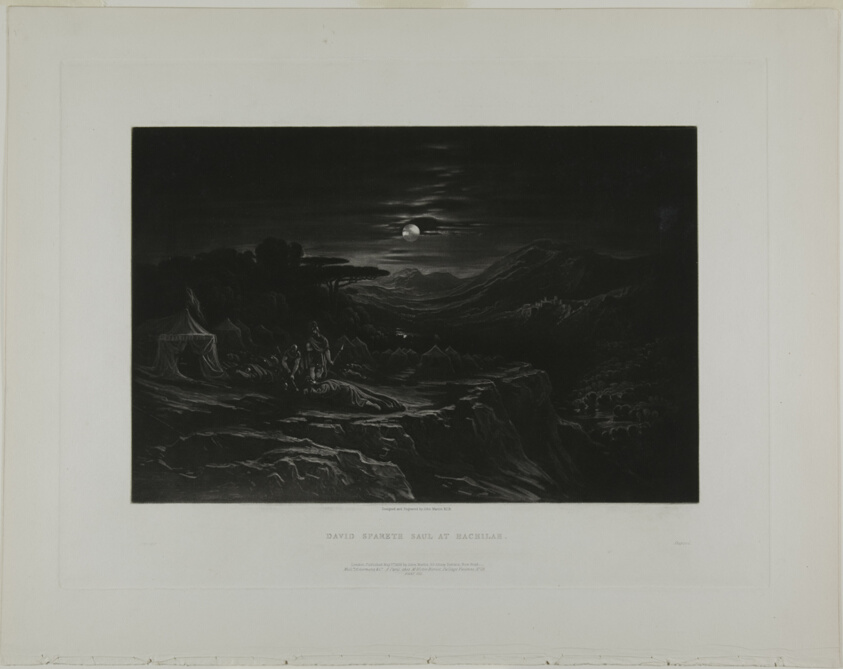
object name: Print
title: David Spareth Saul at Hachilah, from Illustrations of the Bible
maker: John Martin (English, 1789-1854)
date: 1835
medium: Mezzotint in black on ivory wove paper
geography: England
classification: mezzotint; print; prints and drawing